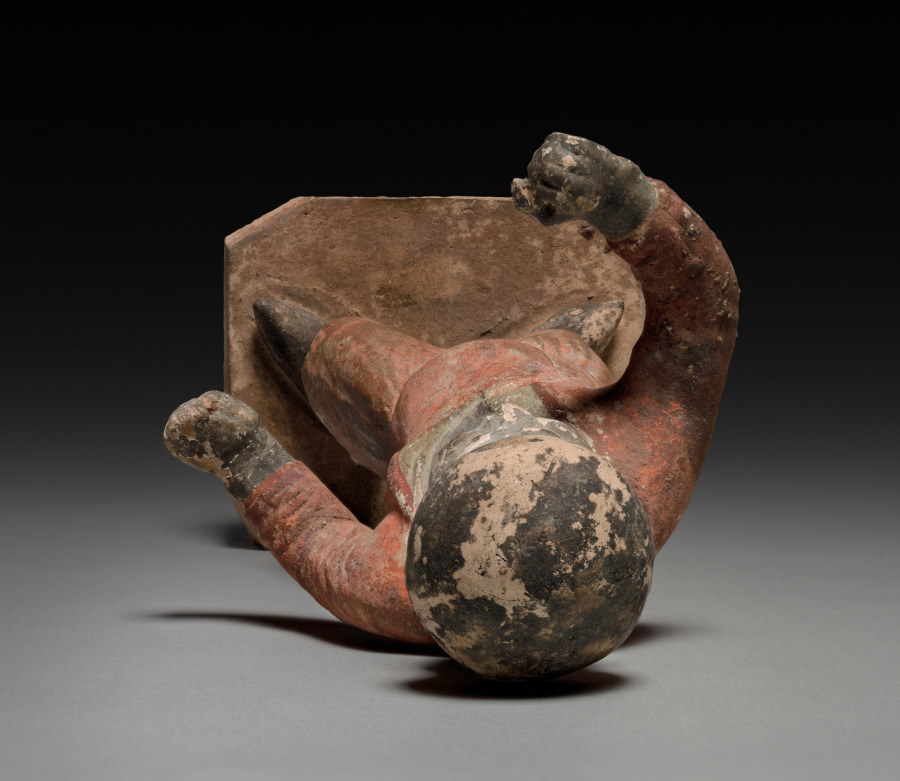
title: Groom (Tomb Figure)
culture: China, Sui dynasty (581-618) - Tang dynasty (618-907)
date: late 500s–early 600s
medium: buff earthenware with polychromy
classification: Sculpture